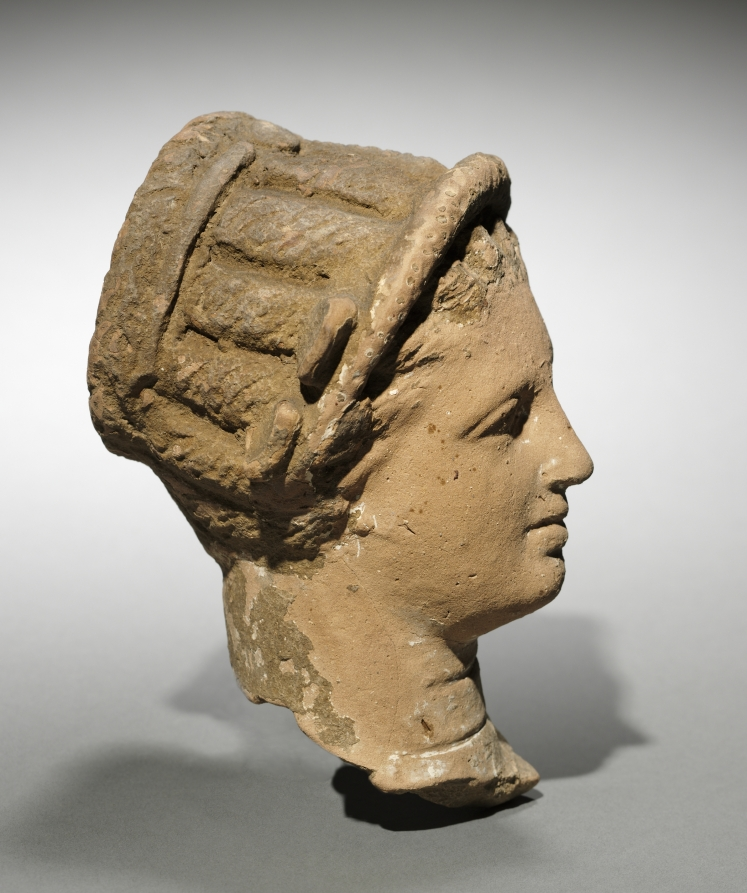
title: Head of a Woman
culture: Greece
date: 400s BCE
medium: terracotta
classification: Sculpture